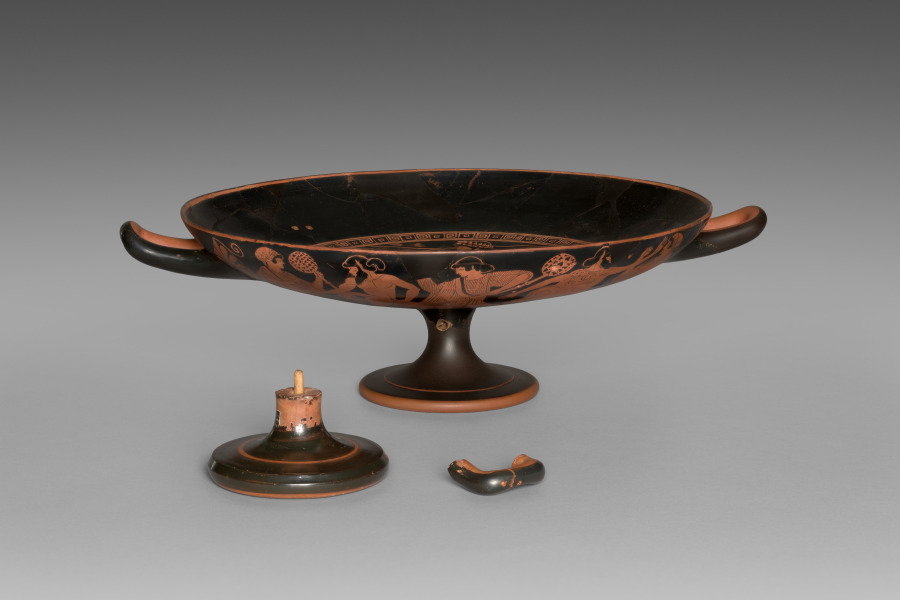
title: Red-Figure Kylix (Drinking Cup): Dionysos and Satyr (I); Satyrs and Maenads (A, B)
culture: Greece, Athens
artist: attributed to Douris (Greek, Attic, active c. 500–470 BCE)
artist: or Painter of London E 55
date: c. 480 BCE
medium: ceramic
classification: Ceramic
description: Reconstructed from 72 fragments, this cup has been repaired several times, indicating its enduring value to owners. Pairs of holes straddling cracks once held ancient wire or clamp repairs. Numerous incomplete holes may signify recent interventions. Early modern efforts to hide cracks and certain features of the satyrs that could have offended sensibilities of the time also masked the original artistry of its painting. So, for many years the cup languished in storage. Cleaning and reconstruction in 1952–53 revealed enough to allow attribution to a respected vase painter, Douris, reviving the cup’s reputation. More recently, a different attribution has been suggested, and a new conservation campaign replaced ancient parts from a different cup with modern reconstructions more like those lost.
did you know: In the tondo, a dancing satyr approaches the wine god Dionysos, who holds a kantharos and grapevine.